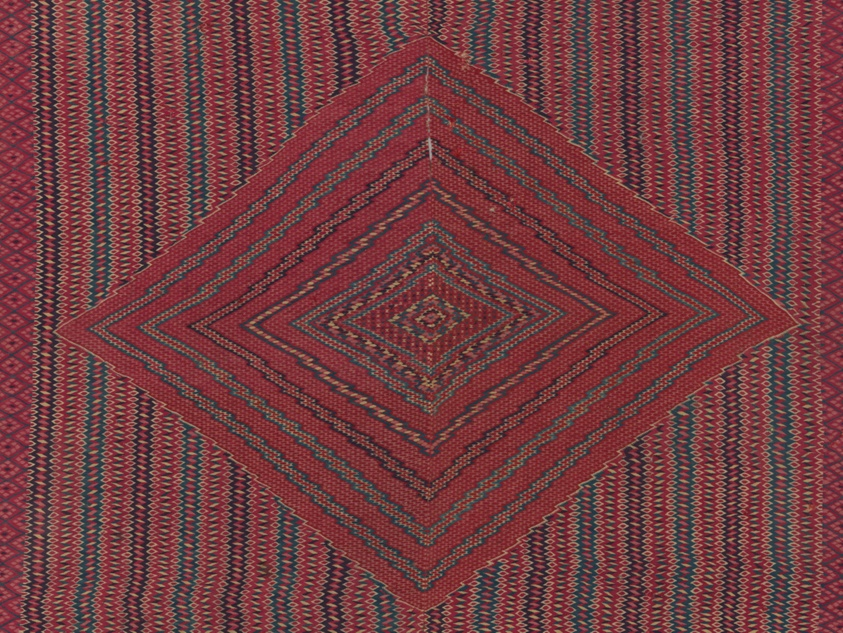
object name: Textile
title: Sarape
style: Folk Art, anasazi, Pre-Columbian, americas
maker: Mexico, possibly Saltillo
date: 1750/1800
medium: Cotton and wool, tapestry weave, slit; single dovetail; attached knotted fringe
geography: Mexico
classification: textile; weaving